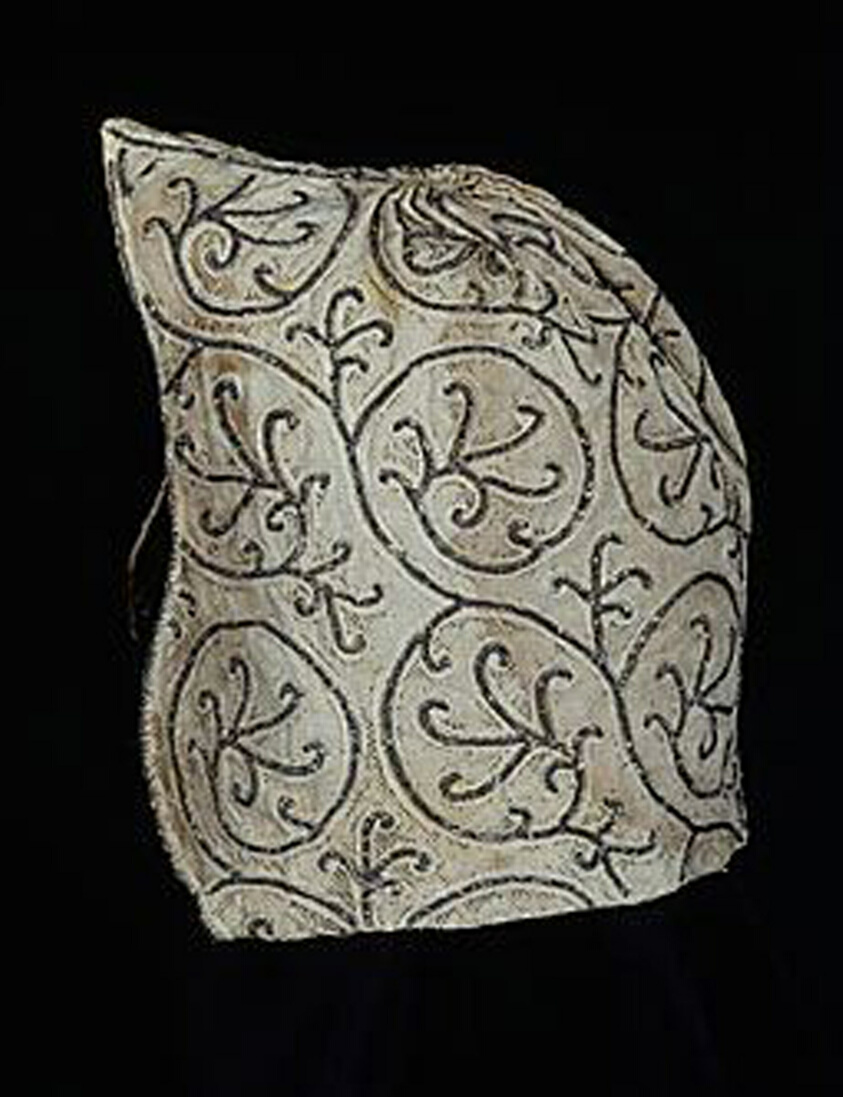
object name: Textile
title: Coif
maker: England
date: 16th century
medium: Linen, plain weave; embroidered with silk, silvered-metal-strip-wrapped fiber, and linen in chain and seed stitches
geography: England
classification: textile; costume accessory - headdress; needlework (visual works); costume; dress (garment); clothing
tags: fashion